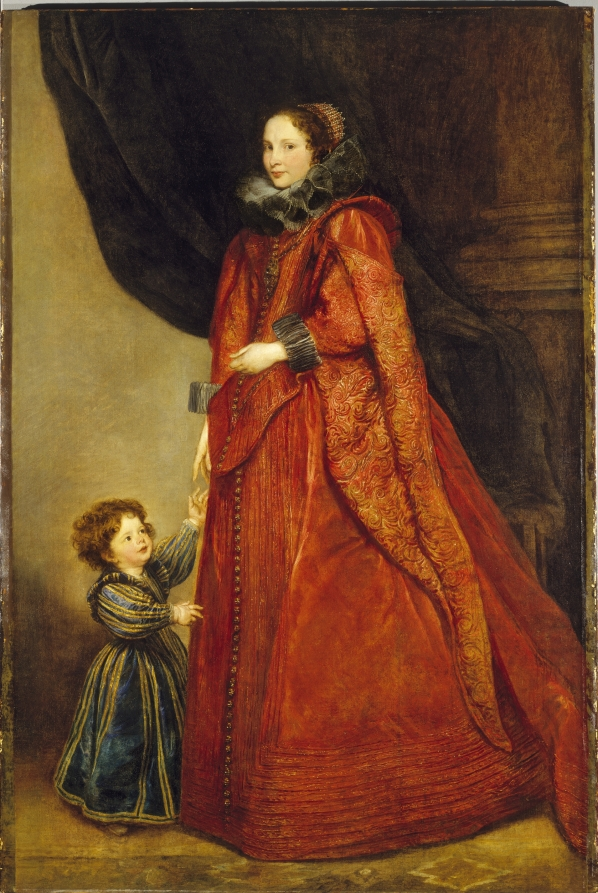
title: A Genoese Lady with Her Child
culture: Flanders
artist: Anthony van Dyck (Flemish, 1599–1641)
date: c. 1623–25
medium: oil on canvas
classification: Painting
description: Prior to the 1600s, large, full-length portraits of wealthy clients usually emphasized the trappings of status above any other qualities. The accuracy of the likeness and vivacity of the person remained subordinate to an easily readable sense of the sitter’s power and position in society. Artists such as Van Dyck transformed this tradition, which sent shockwaves through Genoa, instantly changing the direction of elite portraiture in the city. While the elaborate garb of this unidentified sitter and the scale of the image certainly mark her status, the warmth Van Dyck imparted to her face, the drama of the background, and the touching detail of the child spontaneously reaching upward add life, energy, and theatricality to the work.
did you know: This portrait was a departure from the painting style popular at this time, focusing less on a demonstrative display of wealth and status and more on capturing the essence of the sitter. Although the clothing denotes affluence, this intimate interaction between mother and child transcends class boundaries.